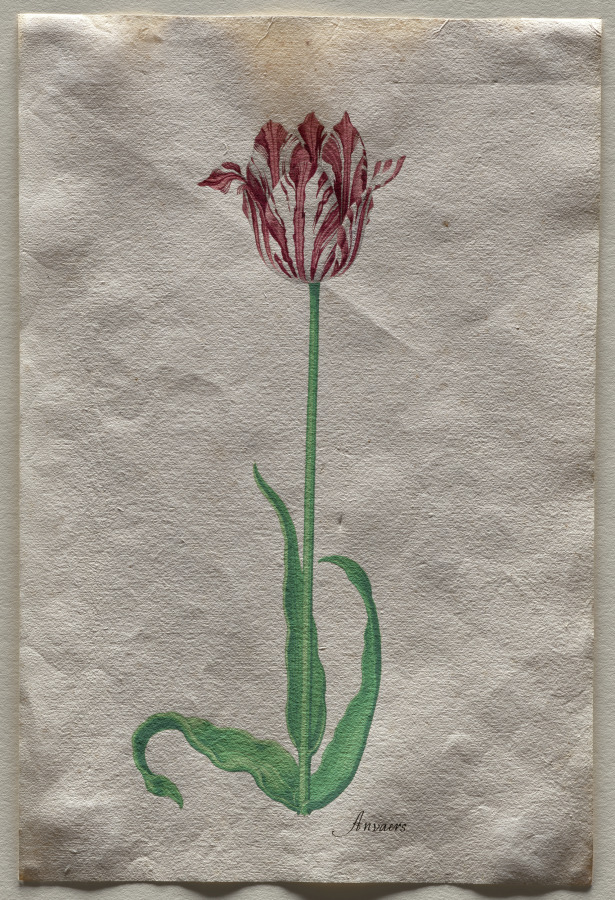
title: Study of a Tulip (Anvaers)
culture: Netherlands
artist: Pieter Holsteyn II (Dutch, c.1612–1673)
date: c. 1645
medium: Point of brush and transparent and opaque watercolors with traces of graphite and gum glazing on antique laid paper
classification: Drawing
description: This image of a tulip was made as part of a tulip book used as a grower’s marketing tool during the so-called tulip mania, a speculative bubble in 17th-century Holland, when ten tulip bulbs could cost more than a stately Amsterdam canal house. The striations on the tulip, which were caused by a virus in the bulb, made it especially valuable. Pieter Holsteyn II was one of many artists in the Netherlands at the time who specialized in botanical illustration.This tulip's name, inscribed on the sheet, is the French word for the city of Antwerp.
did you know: In 17th-century Holland, some tulip bulbs were as expensive as a stately Amsterdam canal house.